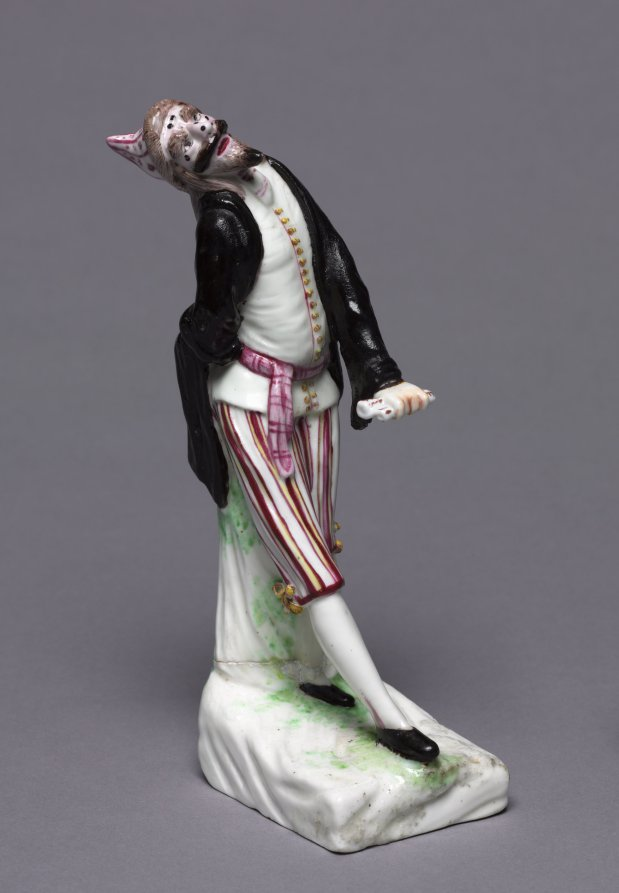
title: Figure of Pantalone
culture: France, Mennecy, 18th century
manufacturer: Mennecy Factory (French)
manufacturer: Mennecy- Villeroy Factory (French)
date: c. 1755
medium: soft-paste porcelain with enamel decoration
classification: Ceramic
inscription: Mennecy-Villeroy factory mark, incised on bottom: "DV"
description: The commedia dell’arte, a form of Italian improvisational theater, became widely popular in 18th-century Europe. This figure, with his prominent beard and distinguishing black robe, represents the character of elderly Venetian merchant Pantalone. Depicted in paintings and porcelain, the popularity of these figures demonstrated the influence of the theater on the tastes of the wealthy.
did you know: In the commedia dell’arte, Pantalone was known for his greed, lust, and buffoonery that made him the target of jokes.